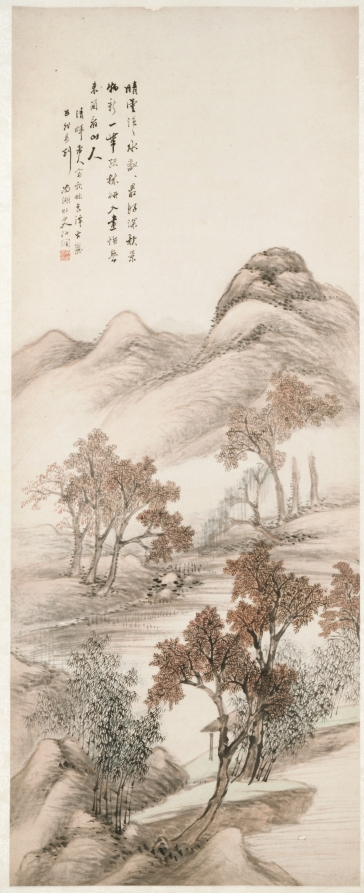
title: Autumn Landscape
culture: China, Jiaxing, Qing dynasty (1644-1911)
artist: Yang Borun (Chinese, 1837–1911)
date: late 1800s–1911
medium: hanging scroll, ink and color on paper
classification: Painting